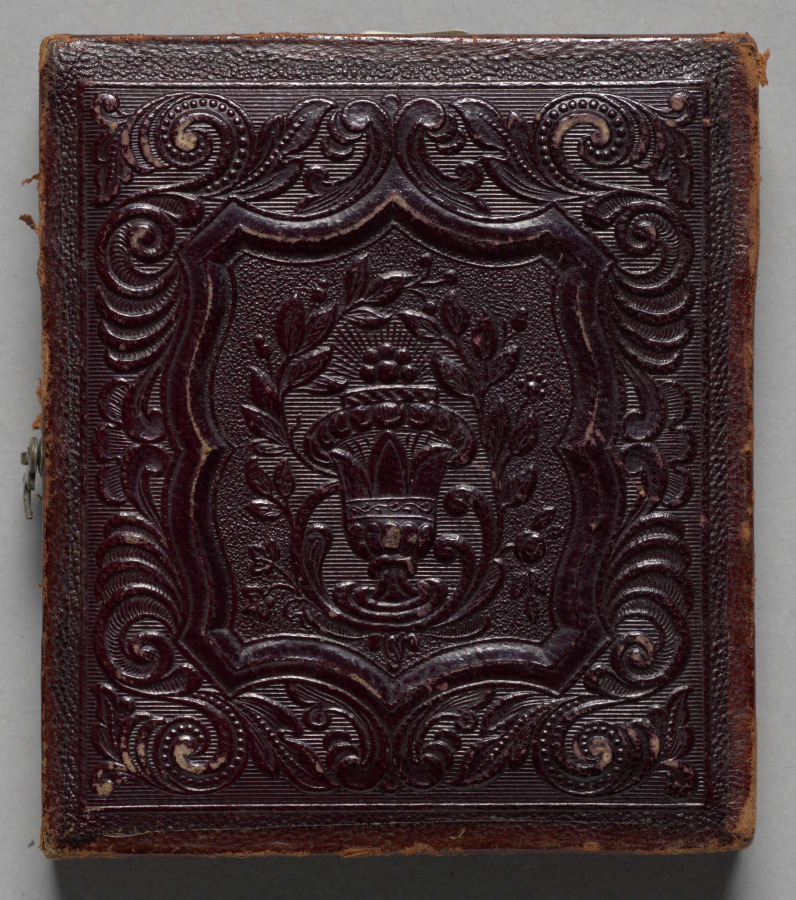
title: Mother with son with blind right eye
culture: America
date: c. 1855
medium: daguerreotype, sixth plate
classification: Photograph